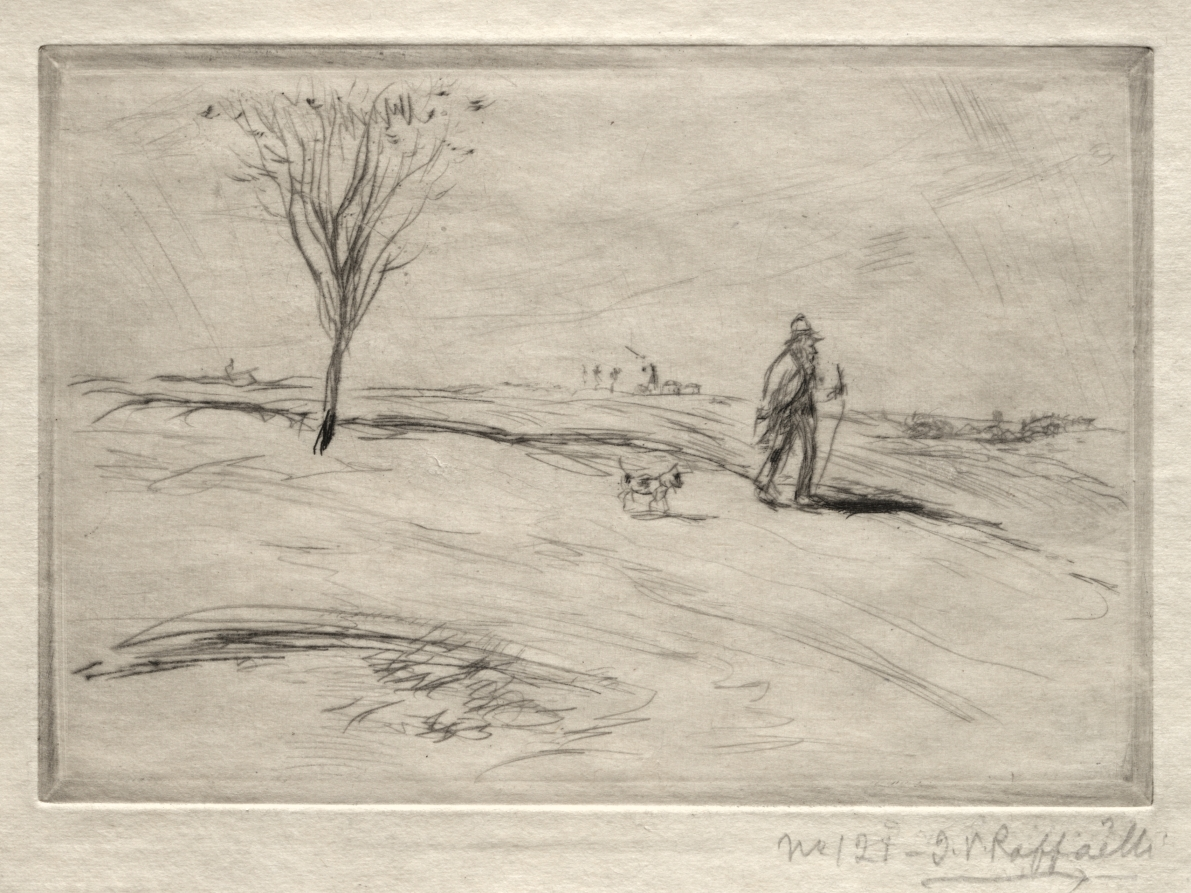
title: Le Chamineau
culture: France, 19th century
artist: Jean-François Raffaëlli (French, 1850–1924)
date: c. 1870–1920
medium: drypoint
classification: Print